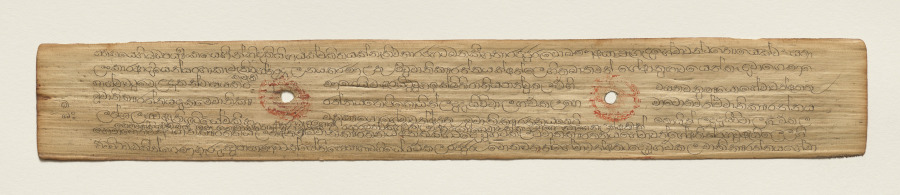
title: Leaf from a Buddhist Manuscript (recto)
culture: Sri Lanka, Singhalese, Late 17th century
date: c. 1700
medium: fiber paper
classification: Manuscript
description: Palm leaf material is still used for manuscripts in Sri Lanka. The palm leaves are prepared first by boiling them, drying them in the sun, and then rubbing them with oils. Scribes then use a metal stylus to incise the text. Then charcoal powder is wiped across the pages, filling in only the inscribed lines.